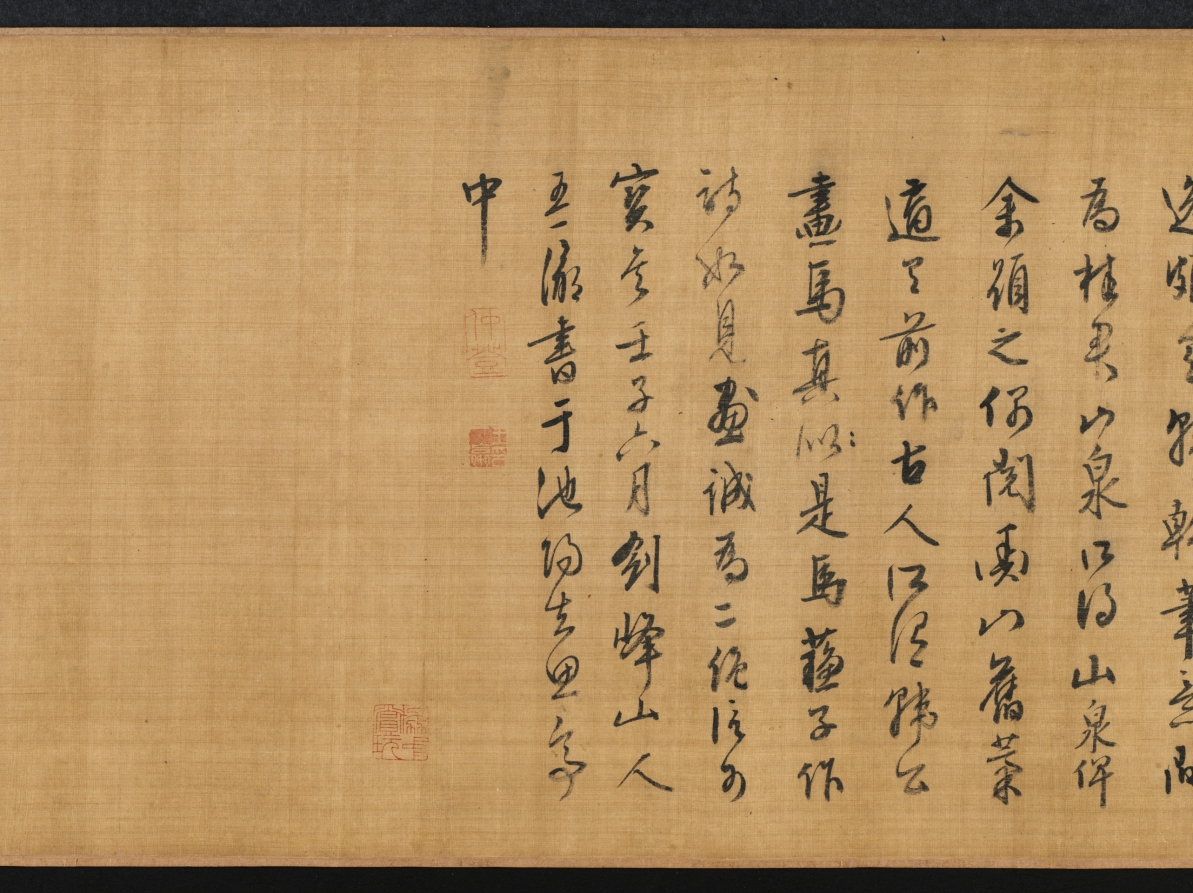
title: Three Horses and Four Grooms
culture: China, Yuan dynasty (1271-1368)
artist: Ren Renfa (Chinese, 1254–1328)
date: c. 1320s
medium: handscroll, ink and color on silk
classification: Painting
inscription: 月山道人. [印] 任氏子明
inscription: 1 colophon and 16 additional seals: 1 poem, 1 colophon dated 1552 or 1612, and 3 seals of Wang Yiying 王一瀛 (1500s); 2 seals of Liang Qingbiao 梁清標 (1620-1691); 6 seals of the Qianlong 乾隆 Emperor (r. 1736-95); 3 seals of the Jiaqing 嘉慶 Emperor (r. 1796-1821); 1 seal of the Xuantong 宣統 Emperor (r. 1908-12); 1 seal of Yu Xiezhong 余協中 (1900s).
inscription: Poem and colophon by Wang Yiying 王一瀛 (1500s): As for painters of horses in the previous dynasty, Surely the name of Yueshan [Ren Renfa] must come first. Under his brush and on his silk, They seem to have just galloped out from the imperial stud. Now as the world overflows with inferiority, Who, from the stable, can recognize a dragon-horse amidst mediocrity. Ren Yueshan [Ren Renfa] of the Yuan Dynasty was best in horse paintings. The three fine steeds he painted in this scroll are so dashing, so vigorous in spirit that they have indeed grasped some of the "brush-idea" of Han Gan. Not long ago this painting came into the possession of Mr. Gui Shanquan, who asked for my inscription. And I, while reading the old manuscripts of Hengshan [Wen Zhengming, 1470-1559], by accident, came cross the poem quoted above. As the ancients said "in painting horses, Master Han was [inspired by and produced] real horses; in composing poems, Master Su [Su Dongpo, the leading Song poet] wrote as if a painting were before him." These are truly what should be considered the two excellences; indeed, they are to be treasured. In the sixth month of the renzi year [either 1552 or 1612]. Jian feng shan ren [The Mountain Dweller of the Sword Peak], Wang Yiying, written in the Qu si ting Pavilion at Chiyang.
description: Ren Renfa's horse images are elegant in appearance and vigorous in spirit. His work attracted not only Chinese scholars but also the Mongols at the imperial court. Inspired by the contemporary scholarly interest in restoring a sense of antiquity in art—an artistic direction led by Zhao Mengfu that exerted a great impact in the Yuan art scene—Ren Renfa, like Zhao Mengfu, modeled his depictions of horses after the Song master Li Gonglin. Another key style component that Ren introduced to this genre was a revival of the Tang classical tradition. The refined color treatment of the horses as seen here was derived from the Tang master Han Gan.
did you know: Only the elegant first horse with a white blaze is accompanied by two grooms, as if its lightning speed required extra supervision.